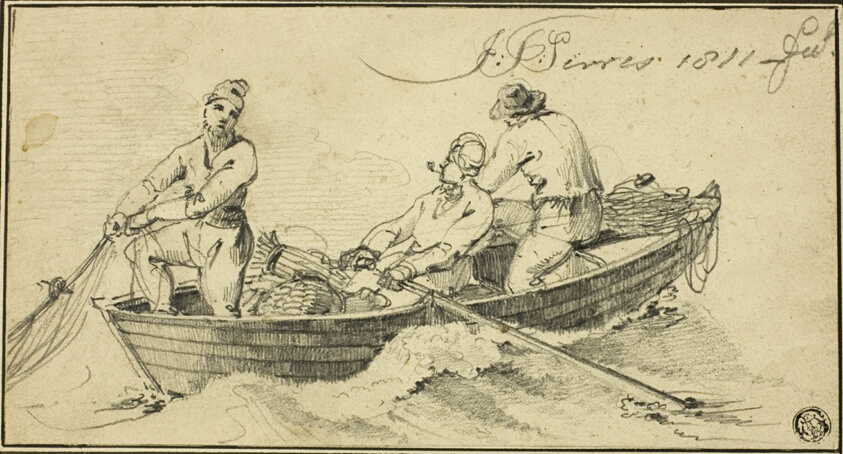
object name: Drawing and Watercolor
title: Three Fisherman in a Boat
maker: John Thomas Serres (English, 1759-1825)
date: 1811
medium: Graphite on cream wove paper laid down on cream wove card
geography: England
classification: graphite; drawings (visual works); prints and drawing